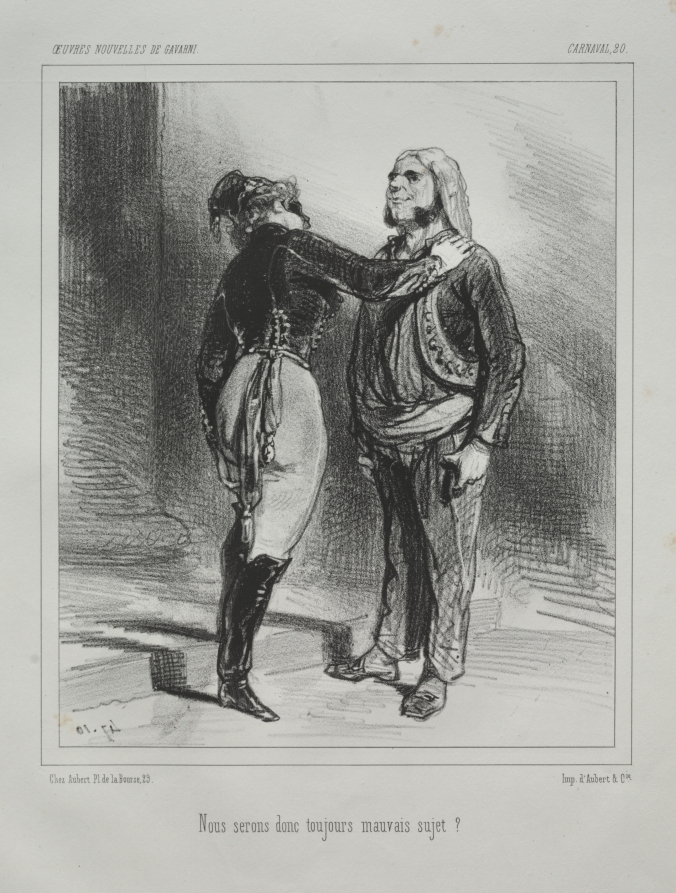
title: Carnaval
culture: France, 19th century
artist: Paul Gavarni (French, 1804–1866)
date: c. 1841–47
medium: lithograph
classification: Print